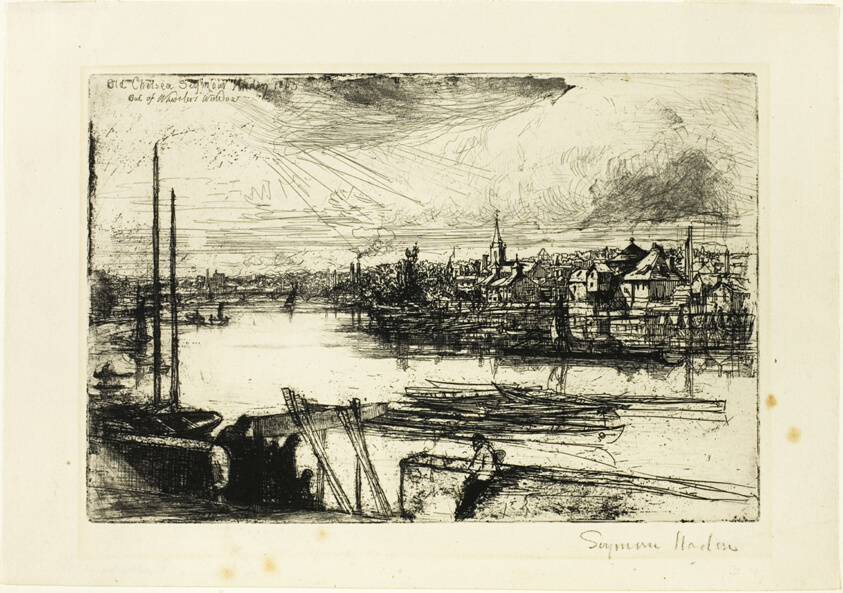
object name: Print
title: Battersea Reach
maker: Francis Seymour Haden (English, 1818-1910)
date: 1863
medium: Etching with drypoint on ivory laid paper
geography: England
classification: etching; print; prints and drawing